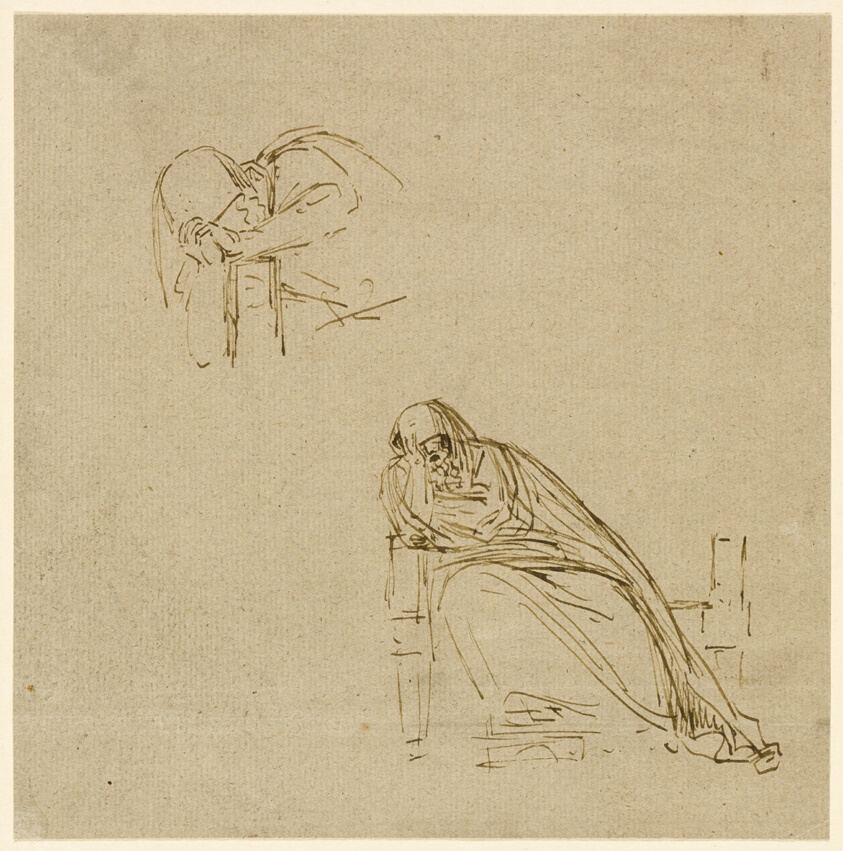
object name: Drawing and Watercolor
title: Two Sketches of a Weeping Woman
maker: Benjamin West (American, 1738-1820)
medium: Pen and brown ink, on gray laid paper, perimeter mounted to cream wove card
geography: United States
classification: pen and ink drawings; drawings (visual works); prints and drawing